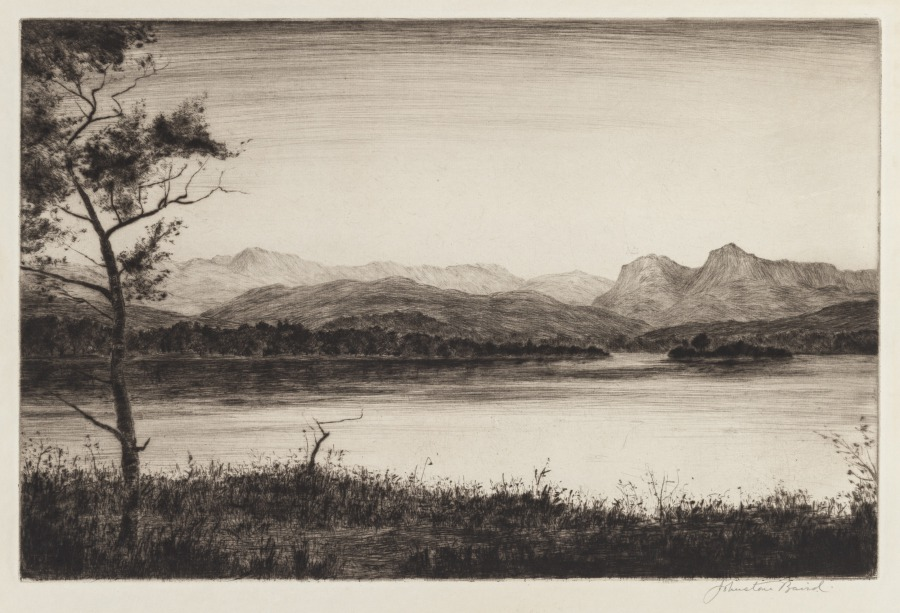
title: Langdale Pikes, Windermere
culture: Britain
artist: Johnstone Baird (British, 1880–1935)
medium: etching and drypoint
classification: Print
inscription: Lower right margin, graphite: Johnstone Baird; lower left corner, graphite: B12587; lower center margin, graphite: “Windermere”